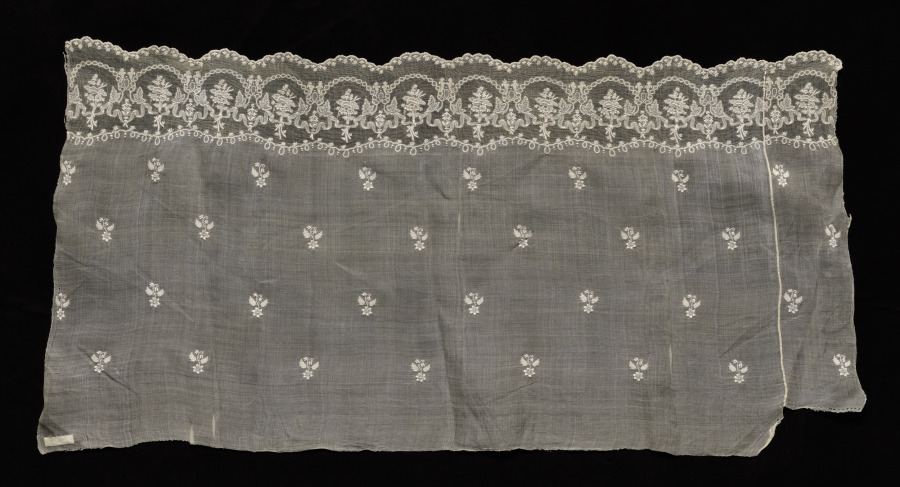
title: Blouse in four pieces (sleeve)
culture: Philippines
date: 1800s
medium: Plain weave piña; needle lace (drawnwork) and white cotton embroidery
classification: Embroidery